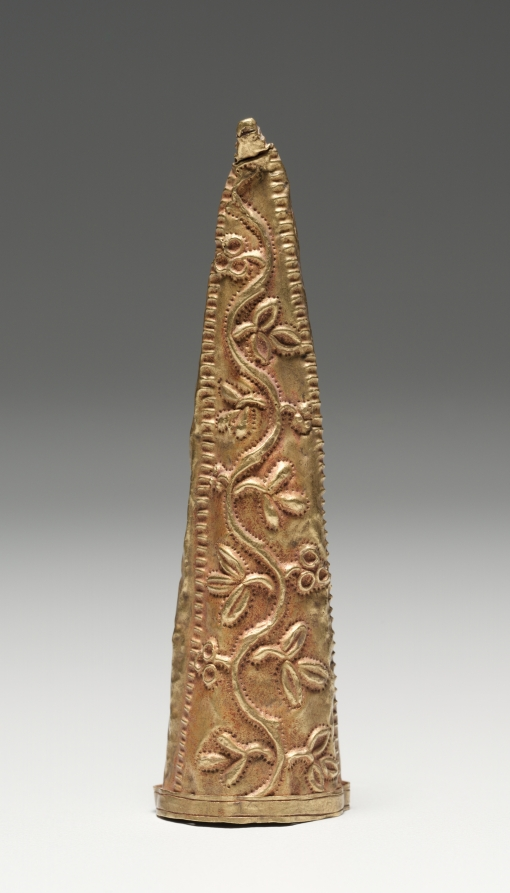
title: Knife-sheath tip (sika boha)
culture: Africa, West Africa, Ghana, Asante Empire/Kingdom, Kumasi or probably Kumasi, member of the goldsmiths' guild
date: 1800s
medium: Gold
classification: Arms and Armor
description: Gold sheaths covered the cast iron blade of a king’s ceremonial knife (sikay), wrapping them with symbolism. In Akan states like the Asante Kingdom, gold embodies life force (kra) and is the sun’s earthly counterpart. Only goldsmiths’ guild members could make gold ornaments for the royals and their entourage, or for the royal treasury. Here, the goldsmith used a tool to push the raised floral, leaf, and geometric designs from the back of a soft sheet of gold (repoussé technique). Small dots outlining some motifs were punched into the metal. Similarly decorated gold sheets and solid ornaments capped a knife’s handle.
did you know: Gold objects like this were frequently melted down to make new objects in new fashions.